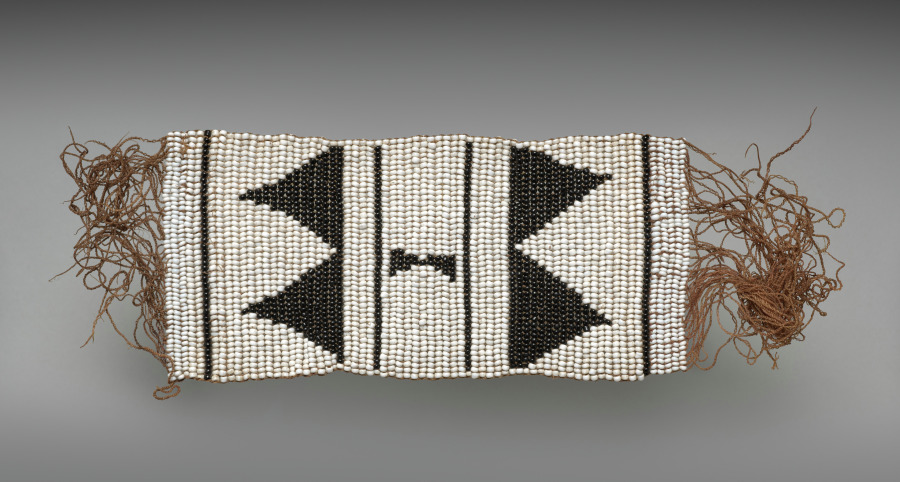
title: Royal ceremonial beadwork: anklet (izitsaba)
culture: Africa, Southern Africa, South Africa, Southeast Cape Region, Unknown female Xhosa-style maker(s)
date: 1800s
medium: Glass beads and sinew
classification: Mixed Media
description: Elite Xhosa women once wore beaded garments like this on festive occasions. Made almost completely from imported Venetian or Bohemian glass beads, they were overt status symbols. Imported beads functioned as money for the Xhosa between circa 1770 and 1829. These garments’ female maker carefully selected beads of the highest quality, uniform in color, shape, and size.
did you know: The beads to make an ensemble like this cost several cattle in the early 1800s, an amount most couldn't afford.